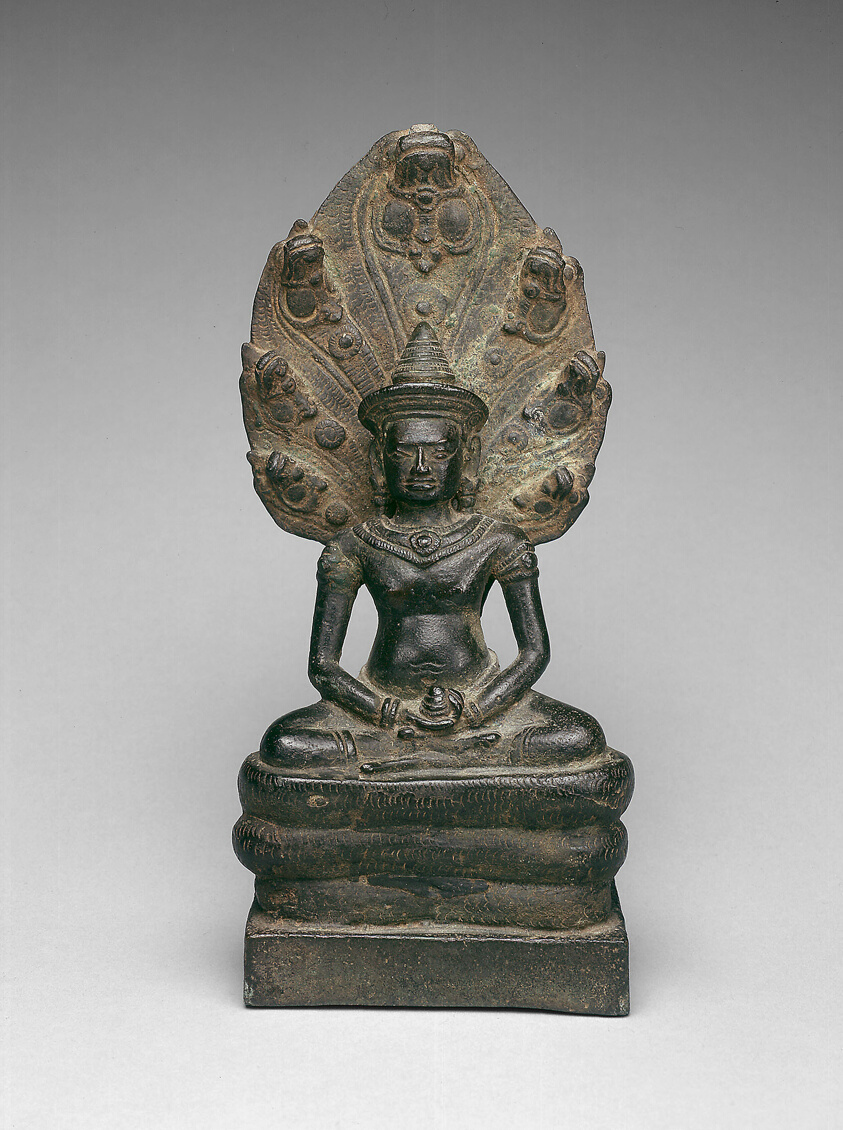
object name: Sculpture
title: Buddha Enthroned on a Serpent (Naga)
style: Southeast Asian, angkorean, cambodian, asian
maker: Cambodia or Thailand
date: Angkor period, early 13th century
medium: Bronze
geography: Cambodia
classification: bronze; metal; sculpture; asian art